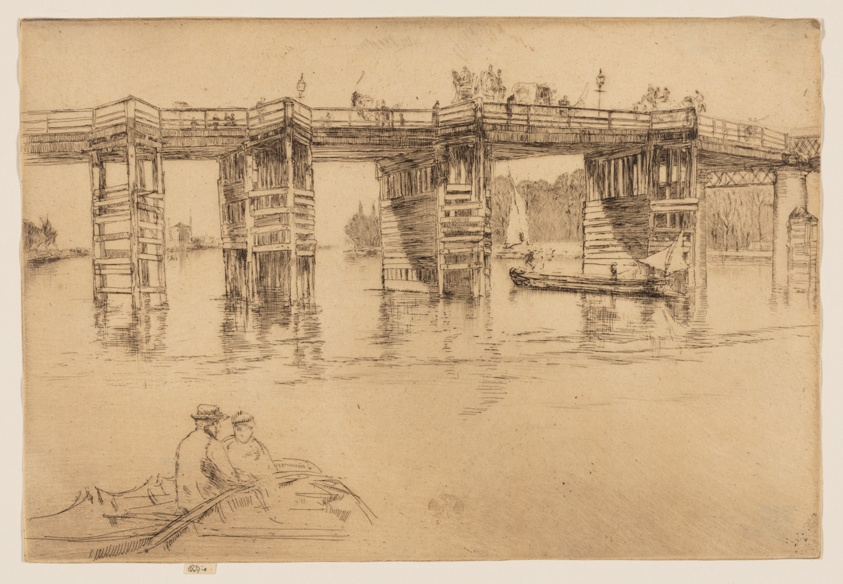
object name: Print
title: Old Putney Bridge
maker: James McNeill Whistler (American, 1834-1903)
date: 1879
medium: Etching and drypoint with foul biting in dark brown ink on cream laid paper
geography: United States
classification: etching; drypoint; foul biting; print; prints and drawing; paper